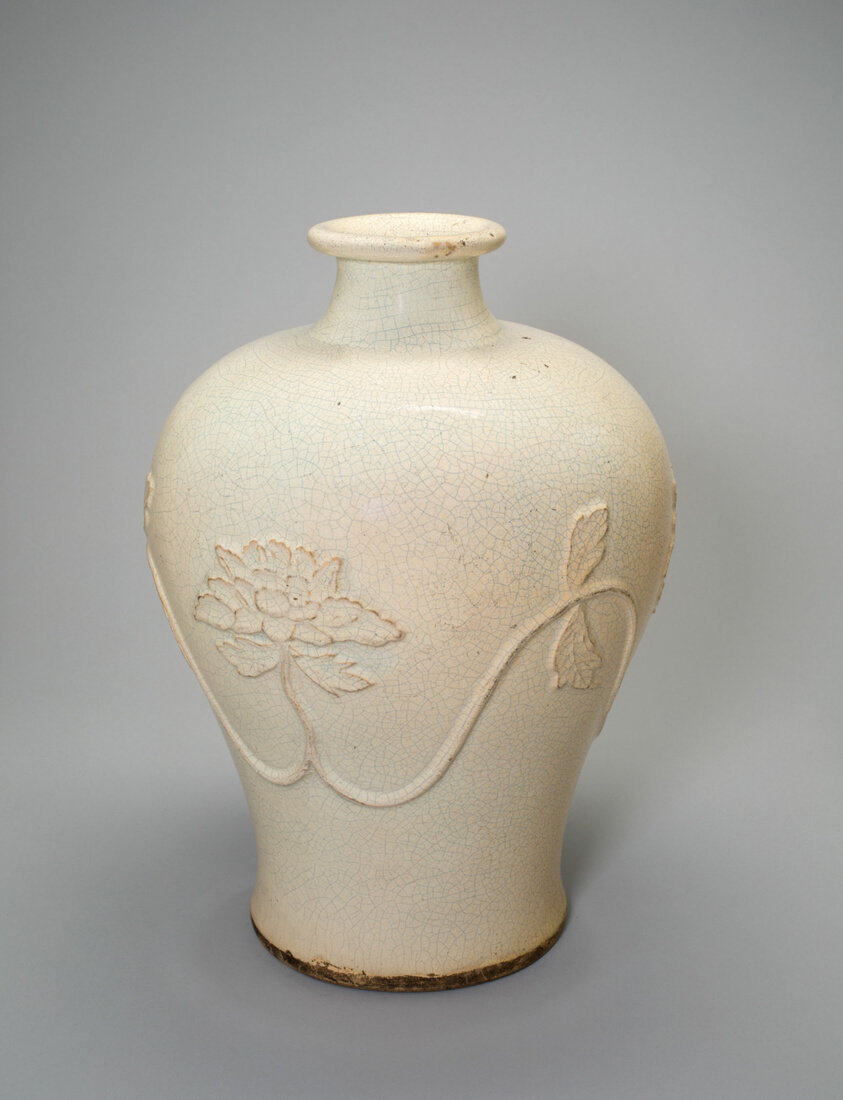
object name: Vessel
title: Baluster-Shaped Vase with Peony Scroll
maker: China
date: Ming dynasty (1368–1644) or later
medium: Stoneware with underglaze molded decoration and white glaze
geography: China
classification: stoneware; asian art; ceramics